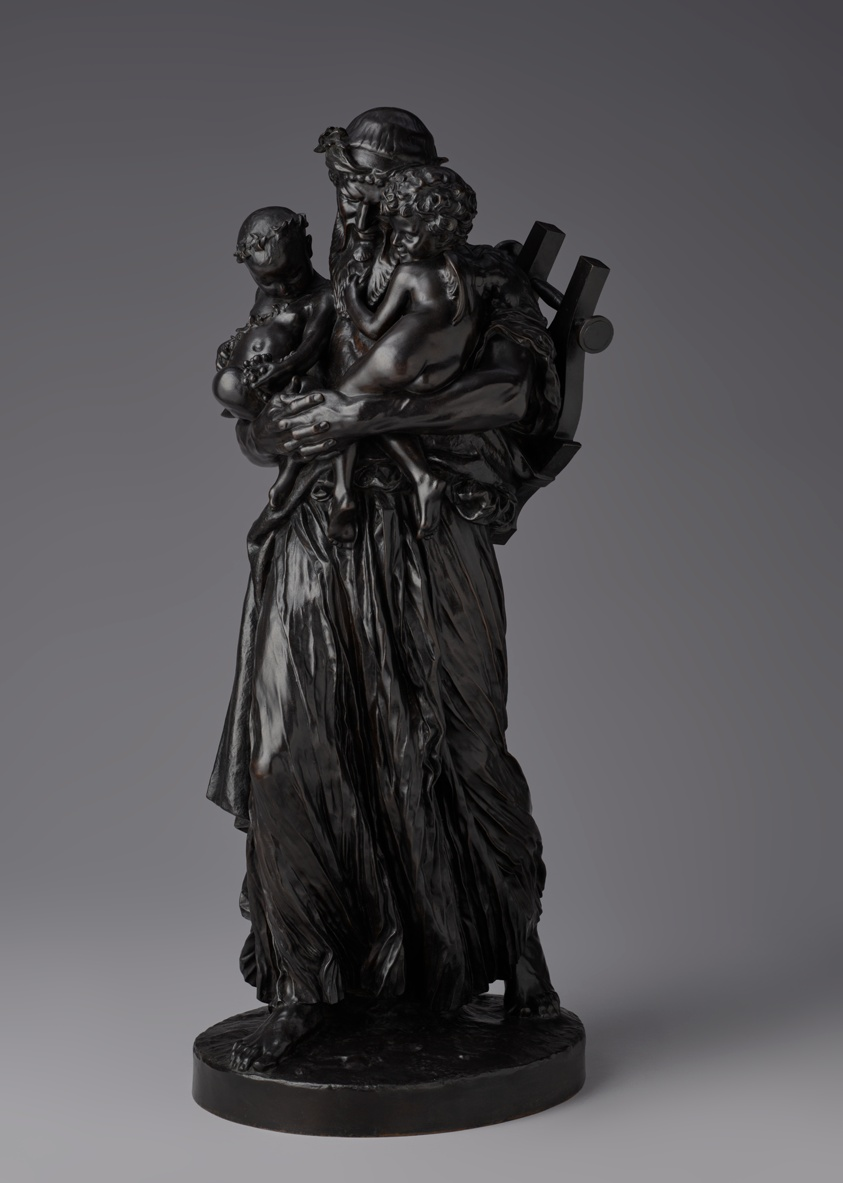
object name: Sculpture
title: Anacreon with the Infants Bacchus and Cupid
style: nineteenth century, 19th century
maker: Jean Léon Gérôme (French, 1824–1904)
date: Modeled 1878, cast c. 1893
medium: Bronze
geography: France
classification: statuette; sculpture; french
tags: mythological figures, men, children, gods (deities), mythology, cupids, man, babies, Greek gods, mythical